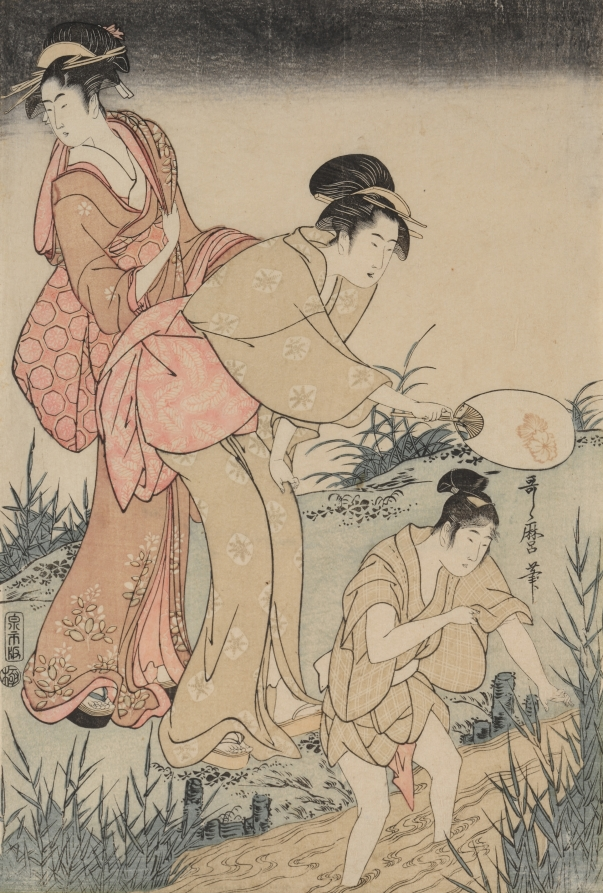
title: Catching Fireflies Beneath a Willow Tree (right)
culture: Japan, Edo period (1615–1868)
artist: Kitagawa Utamaro (Japanese, c. 1754–1806)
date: c. 1796–97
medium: triptych: color woodblock print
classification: Print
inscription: Artist's signature: Utamaro hitsu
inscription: Publisher: Izumiya Ichibei (Senichi han). Censorship seal: kiwame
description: Caught up in a frenzied pursuit of fireflies, one boy has waded into a stream after his quarry, while a younger one watches in anticipation as a young woman thrusts her fan into the air in the hope of capturing hers. In the center of the composition, a girl examines the insects trapped in her elegantly carved cage.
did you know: A sense of movement is conveyed by their sleeves fluttering in the breeze.